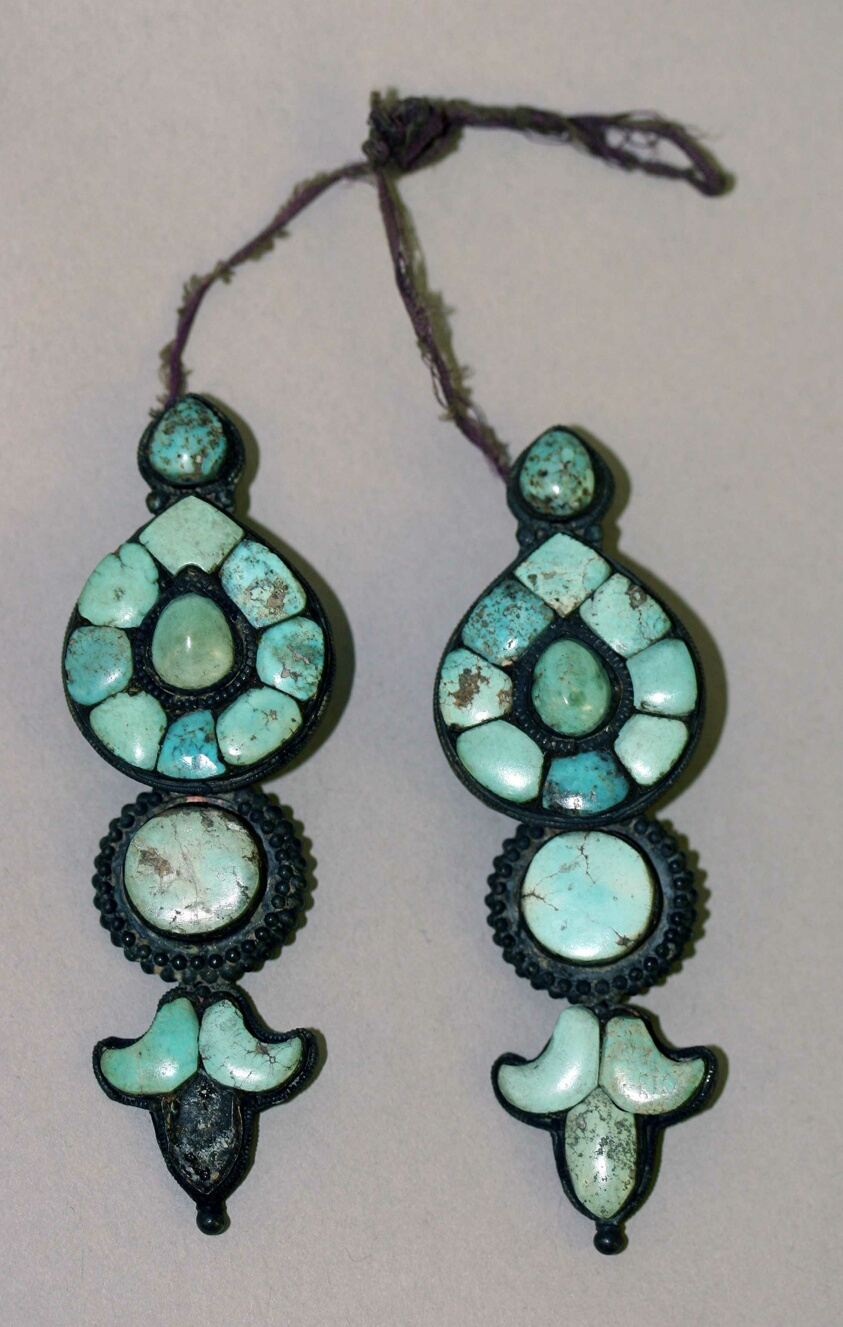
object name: Costume and Accessories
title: Pair of Women's Earrings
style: Himalayan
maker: Tibet; Lhasa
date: 19th century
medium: Silver and turquoise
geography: Tibet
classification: jewelry; asian art; costume